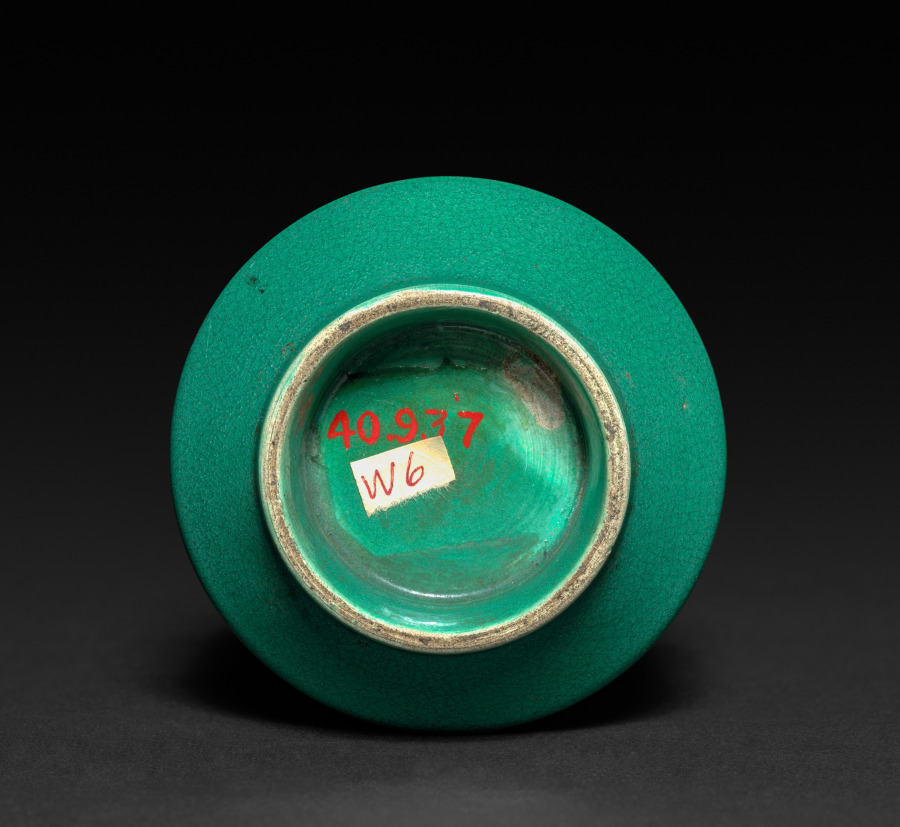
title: Camellia-Leaf-Green Cylindrical Vase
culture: China, Qing dynasty (1644-1911), Kangxi reign (1661-1722)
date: 1661–1722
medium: porcelain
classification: Ceramic